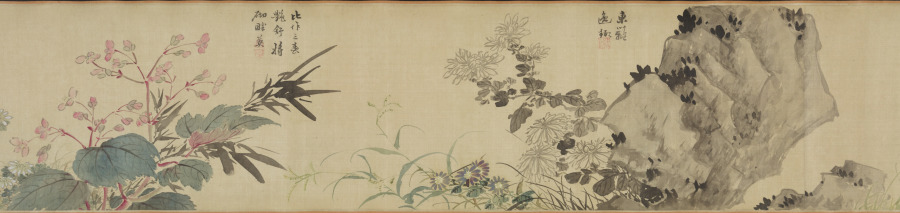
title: Flowers of Four Seasons, with Poems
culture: China, Ming dynasty (1368–1644)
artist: Wang Guxiang (Chinese, 1501–1568)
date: 1531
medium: handscroll; ink and light color on silk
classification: Painting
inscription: Artist's inscription, signature, and 15 seals. Ink Orchids. Sewn as pendants for the man of worth, swaying quiety, fragrance in the valley. [seal] Hsiao-chu ts'un Peony. Wiping his face, the young gentleman Ho [Ho Yen of Wei, Three Kingdoms] appears to have been powdered. His previous life was the perfume-stealing Han Shou [of Chin, 265–419 CE], the fragrance still lingers. [seal] Ts'un-wu chai. Flowering Crab Apple, New Bamboo. Shao-lin [Du Fu, 712–770] had to put down his brush. [Flowering Crab Apple]. Yü-k'o [Wen T'ung, d. 1079) in vain wrote poems about [Bamboo]. [seal] Yu-shih. Lotus Flowers. When she turns her head, half-hidden by a fan, and casts a glance, all the beautiful women become colorless. [seal] K'ang yüeh huai. Loquat. Ripeness in summer. [seal] Lu-chih. Pomegranate Flower. Whenever I remember you I will send my thoughts, but where have you gone--the [skirt] of pomegranate red? [seal] Wu-ho Sheng. Day Lily. Plant the day lily to forget sorrow. [seal] Yu-shih. Chrysanthemum. The untrammelled joy at the eastern fence. [seal] Lu-chih. Begonia. Comparing it to the beauties of Spring, and spreading them out as trimming for the stone steps. [seal] Yu-shih. Hibiscus. In recent years I have always enjoyed looking at flowers; instead of dark red I preferred pink ones. [seal] Jen-sheng i-lou. Narcissus, Camellia. The jade girdle left behind at Lo River. [Narcissus]. The precious pearls glitter before Spring. [Camellia]. [seal] Lu-chih. Heavenly Bamboo (Nandina domestica). A single branch in the wintry season. [seal] K'ang yüeh huai. Plum. Fragrant snow in the Lo-fou Mountains. [seal] Ts'un-wu chai. In the eleventh lunar month of the hsin-mao year of the Jiaqing era [1531], [I] imitated the boneless style of Yüan masters in sketching from life. Guxiang [seals] Yu-shih; Lu-chih. Translated by Wai-kam Ho/Lingyun Shih Liu (1980)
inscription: 2 colophons and 23 additional seals: 1 colophon dated 1632, and 2 seals of Li Jih-hua [Li Rihua] 李日華 (1565–1635); 1 colophon and 2 seals of Xiang Shengmo 項聖謨 (1597–1658); 3 seals of Liang Qingbiao 梁清標 (1620–1691); 6 seals of the Jiaqing 嘉慶 emperor (r. 1796–1820); 9 seals of Ch'eng Ch'i [Cheng Qi] 程琦 (1911–1988)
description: In this painting, flowers are loosely arranged by the seasons: narcissus and peony represent early spring; yellow loquat and lotus, summer; chrysanthemum, autumn; and the plum and evergreen bamboo, winter. The artist added to each flower a poetic line of calligraphy associating each plant with a historic or legendary figure. For example, the chrysanthemum, along with the line “The untrammeled joy at the eastern fence,” refers to the poet Tao Yuanming (died AD 427) who enjoyed chrysanthemums at the eastern fence in his garden. The scroll illustrates Wang Guxiang’s mastery of free brushwork, combining light monochrome ink with transparent colors. In his inscription, Wang says he used the “boneless” style without outlines as developed during the Yuan dynasty (1279–1368). Wang was a native of Changzhou, a city in southeast China known for its rich flora and fauna, and flower-and-bird painting tradition.